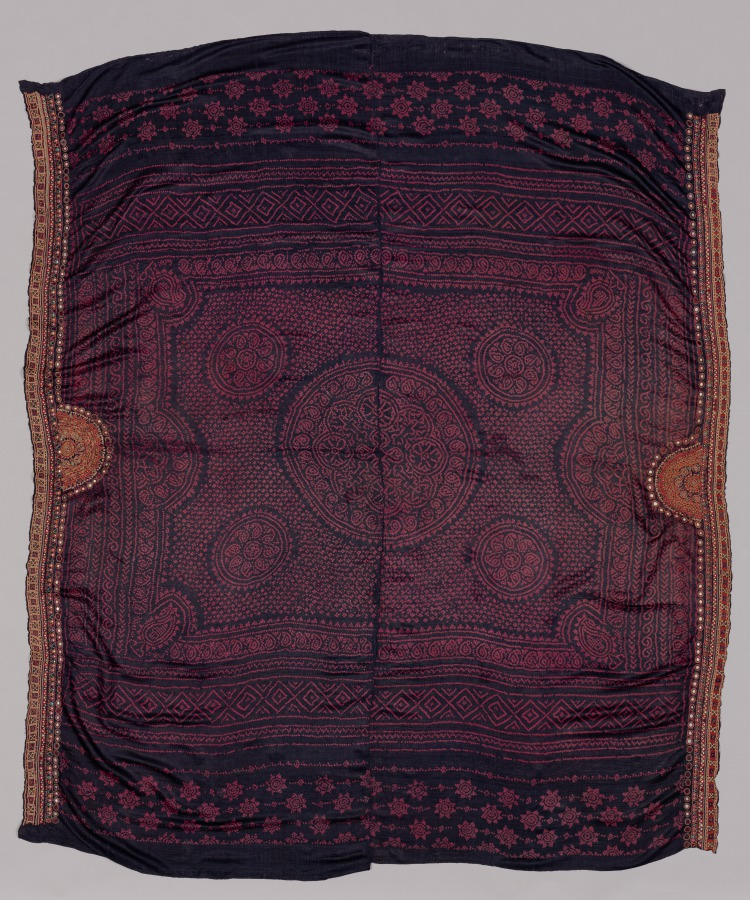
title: Sari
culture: India, 19th century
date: 1800s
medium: tie-dyed, embroidered borders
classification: Textile